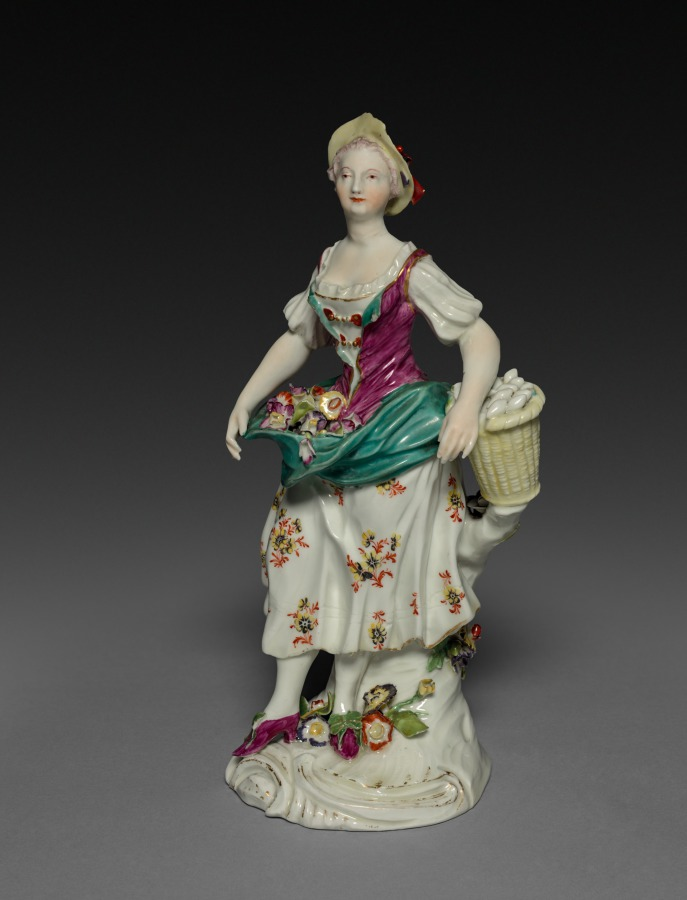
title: Farmer's Wife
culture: England, Derby, mid-18th century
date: 1760–1765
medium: soft-paste porcelain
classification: Ceramic